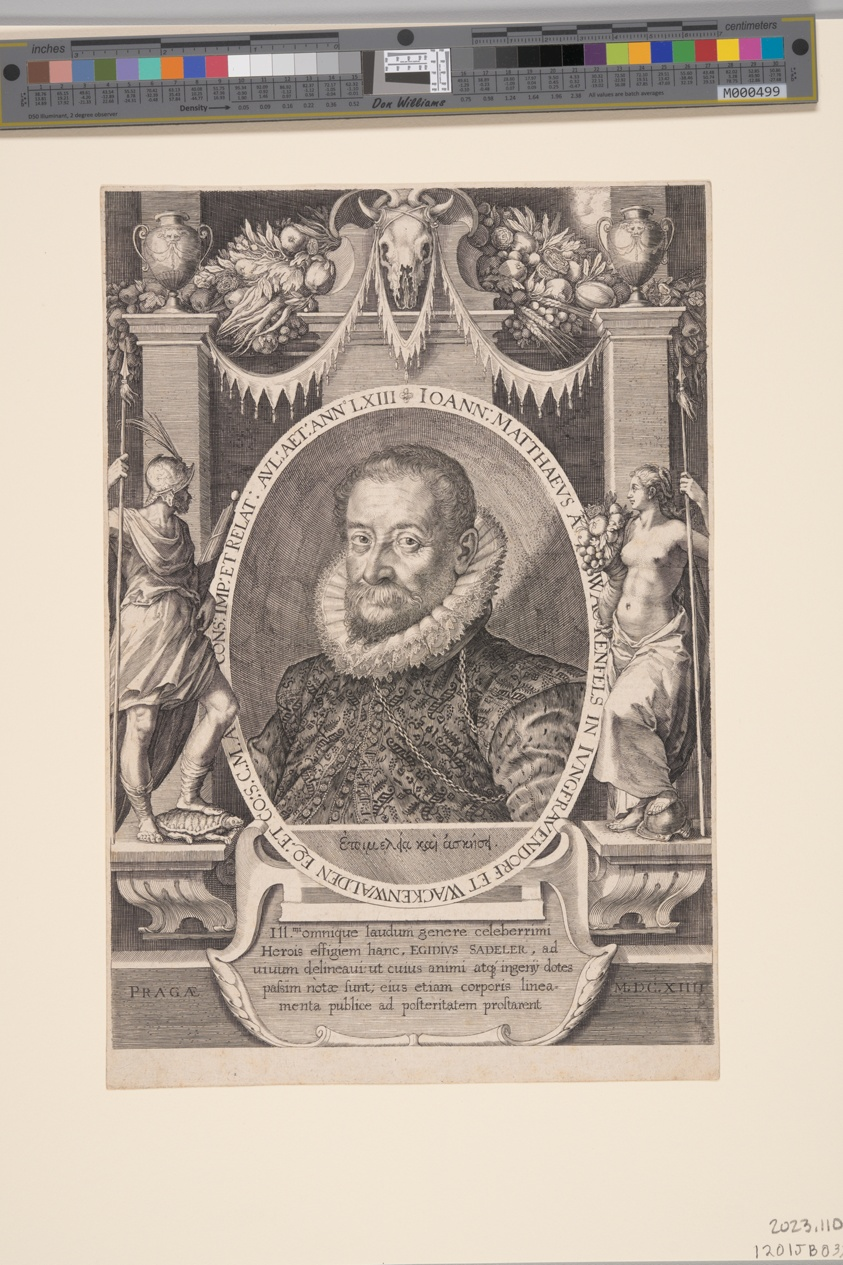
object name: Print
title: Johannes Matthaeus Wacker von Wackenfels, Diplomat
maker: Aegidius Sadeler II; Flemish, c. 1570–1629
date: 1614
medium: Engraving on paper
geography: Flanders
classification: engraving; paper; print; prints and drawing